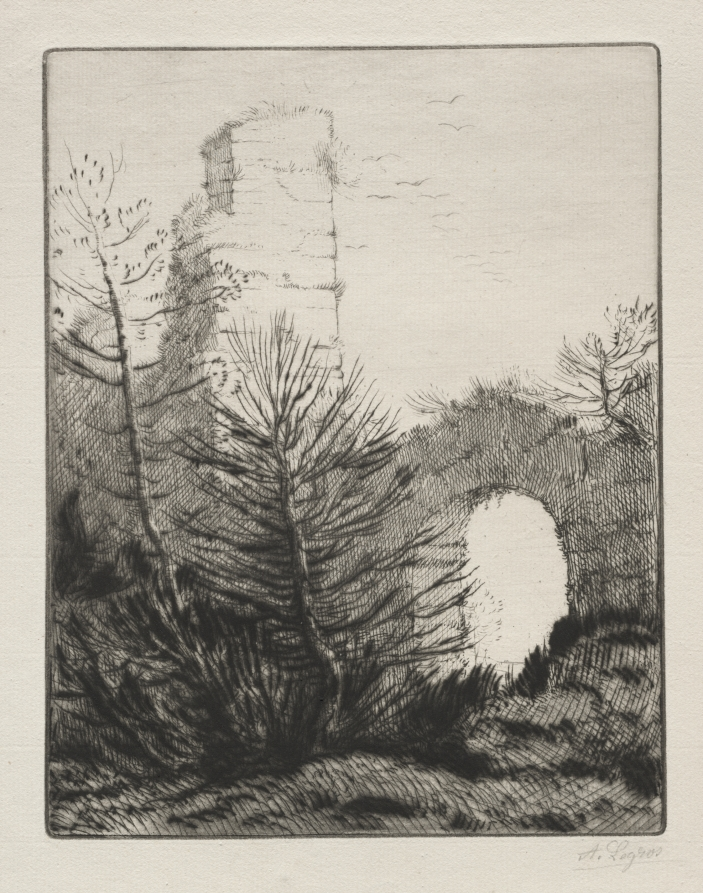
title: Ruins of a Monastery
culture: France, 19th-20th century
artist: Alphonse Legros (French, 1837–1911)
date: c. 1857–1911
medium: etching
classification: Print